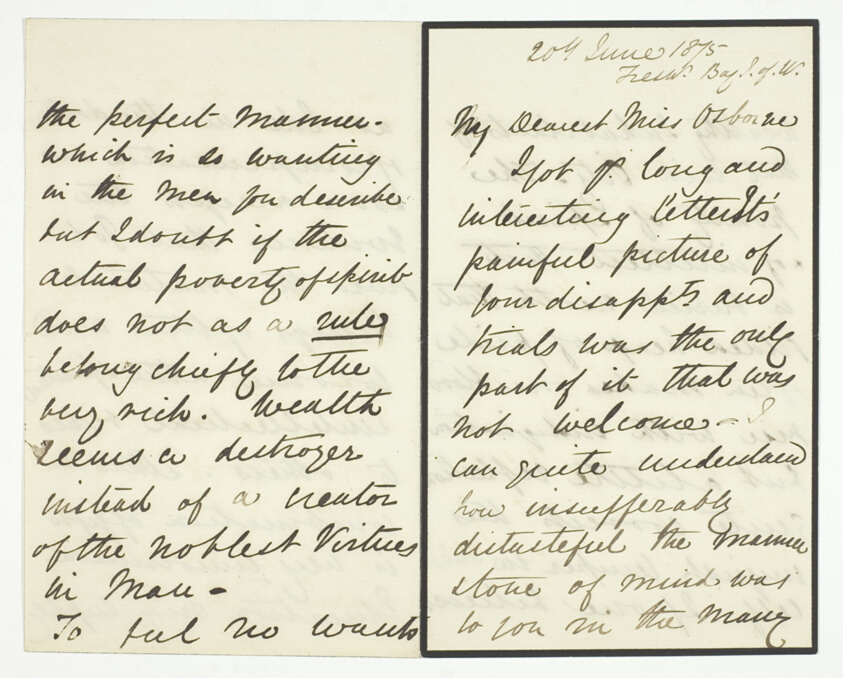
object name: Photograph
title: Autograph Letter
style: 19th century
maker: Julia Margaret Cameron (English, 1815–1879)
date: 20 June 1875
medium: Pen and ink, two page, double-sided autograph letter, signed Julia Margaret Cameron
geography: England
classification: pen and ink drawings; archival material; photography; photograph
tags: Collected by Hugh Edwards